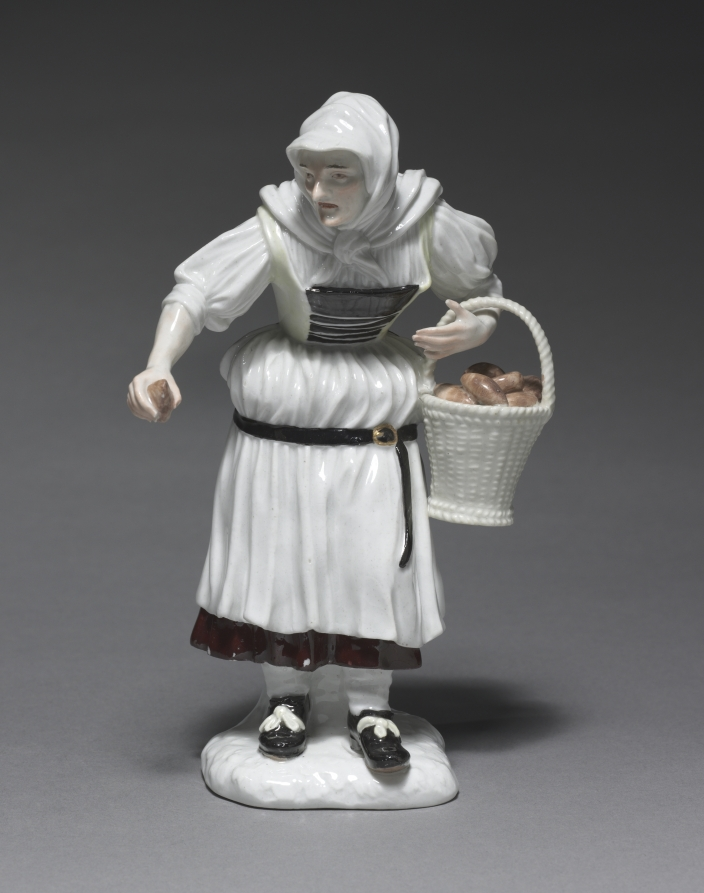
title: Peasant Woman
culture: Germany, 18th century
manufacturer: Meissen Porcelain Factory (German, est. c. 1710)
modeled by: Johann Joachim Kändler (German, 1706–1768)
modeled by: and/or Peter Reinicke (German, 1715–1768)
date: 1740–1750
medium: porcelain with enamel decoration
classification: Ceramic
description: The official Saxon porcelain factory at Meissen not only introduced the manufacture of true, hard-paste porcelain to Europe but also popularized the creation of small porcelain sculptures to be used primarily as dining table decorations. Realistic subjects based on contemporary life were introduced in the 1740s. J. J. Kaendler was the most famous of several modelers who worked at the Meissen factory.